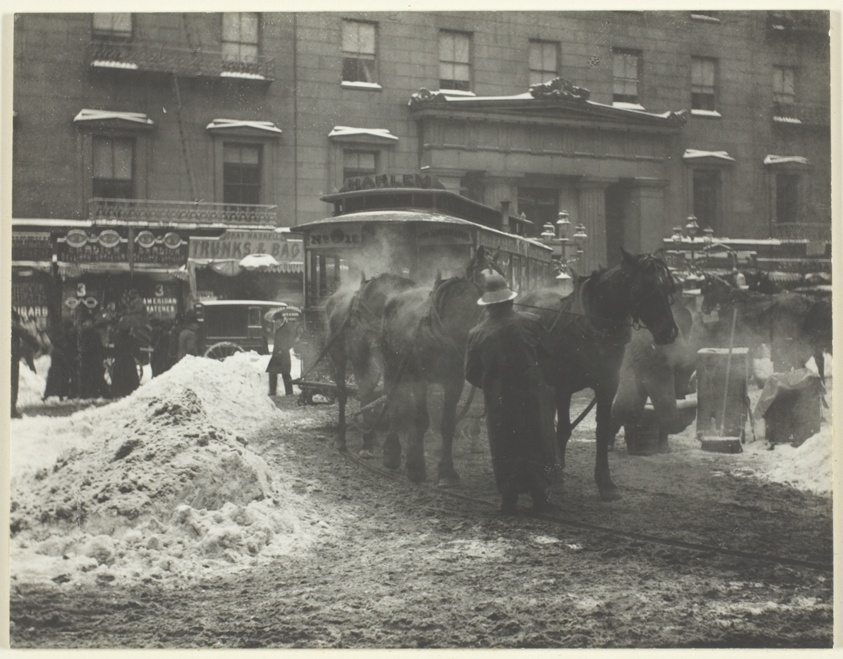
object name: Photograph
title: The Terminal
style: Pictorialism, 19th century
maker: Alfred Stieglitz (American, 1864–1946)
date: 1893, printed 1920/39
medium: Gelatin silver print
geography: United States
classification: gelatin silver (developing-out-paper) pr; photographic process; photography; photograph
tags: cityscapes